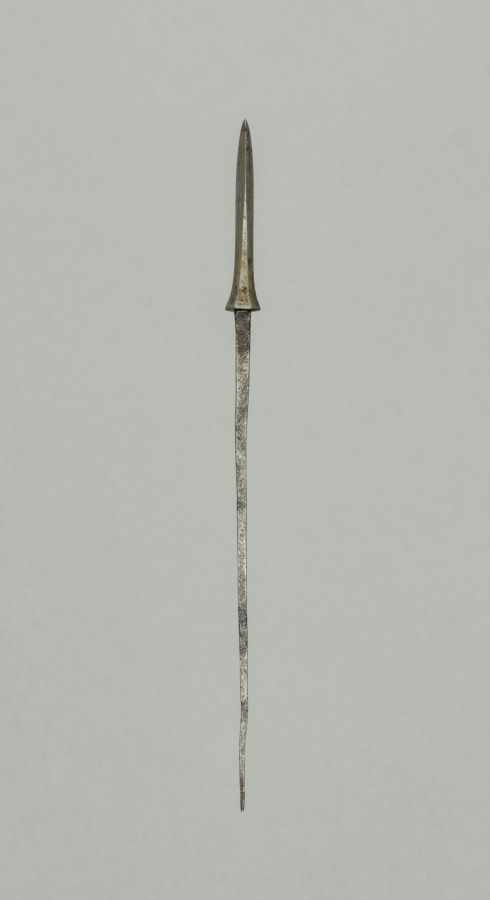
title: Arrow Point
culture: Japan, Edo period (1615–1868)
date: 1700s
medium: steel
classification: Arms and Armor